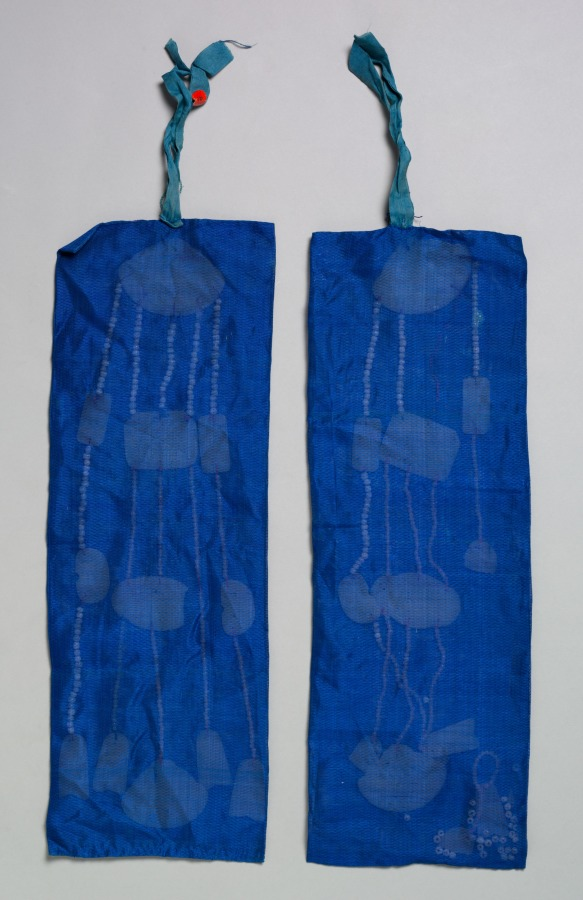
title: Jade String Pendant for the Royal Ceremonial Costume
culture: Korea, Joseon dynasty (1392–1910)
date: late 1800s–early 1900s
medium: Silk: gauze weave and plain weave; jade and beads (2 sizes)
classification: Garment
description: This is a set of royal ceremonial robe and accessories worn by a high-ranking court official for attending special state ceremonies. The set consists of an inner coat, an outer coat, a skirt, a back apron, a crown, a pair of jade tassels, a tablet, and a belt.